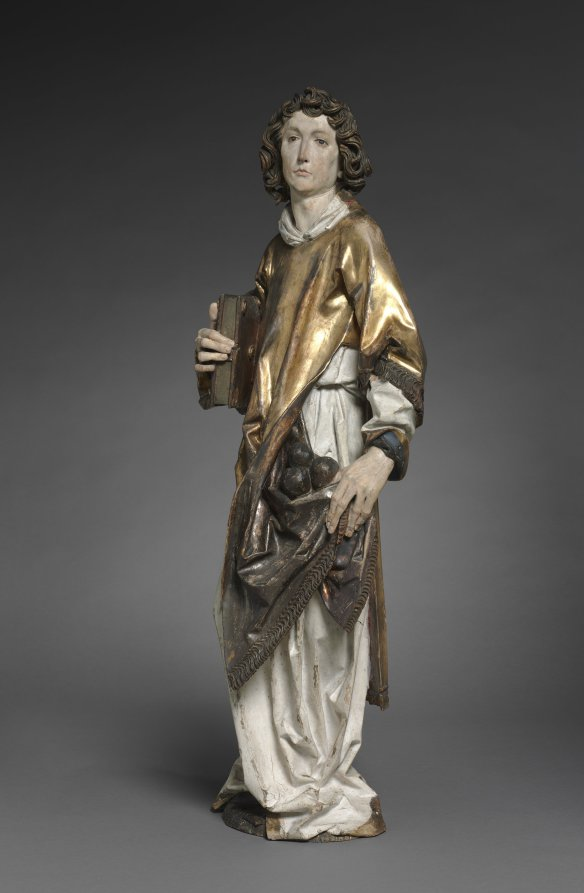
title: Saint Stephen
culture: Germany, Würzburg, 16th century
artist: Tilman Riemenschneider (German, active Würzburg, c. 1460–1531)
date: 1502–8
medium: lindenwood with polychromy and gilding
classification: Sculpture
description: This sculpture, along with that of Saint Lawrence (1959.42) and two others in Germany, are believed to be the remaining fragments of a large altarpiece carved by Riemenschneider for the Dominican convent in Rothenburg in Franconia (demolished in 1813). Saints Stephen and Lawrence both wear the dalmatic to indicate their status as deacons in the early church. Each holds a symbol of his martyrdom; here, Saint Stephen cradles some stones to indicate his death by stoning. Art in Germany through the early 1500s remained firmly anchored in the late Gothic style with its associated interests in realism. Riemenschneider was one of the most prolific and versatile sculptors of this style, a recognized master in both stone and wood. His flourishing workshop employed as many as 40 apprentices in sculpting, woodcarving, and painting. His sculptures are noted for the dreamy, melancholy, and introspective quality in their expressions, as well as their remarkable attention to detail.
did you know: Tilman Riemenschneider (c. 1460–1531) is probably the most famous German sculptor of the period around 1500.